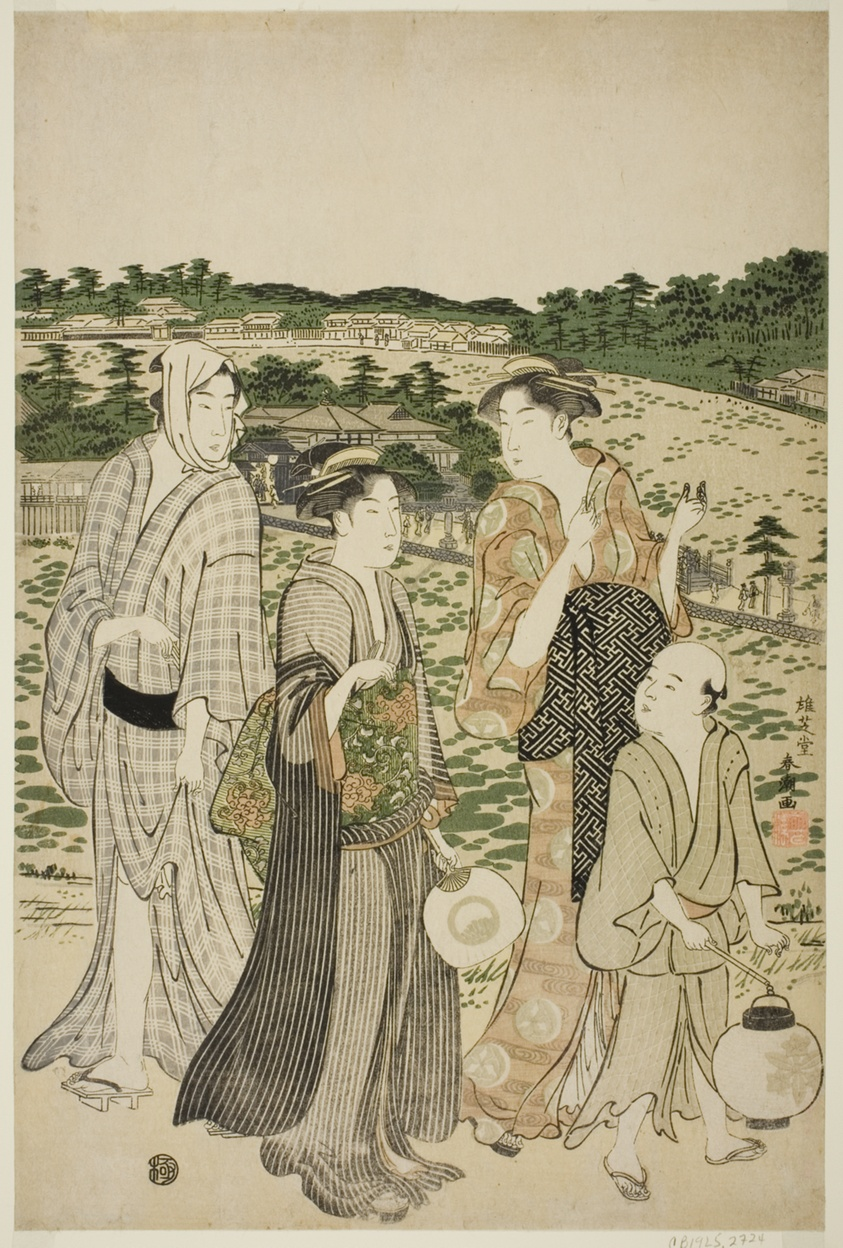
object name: Print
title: Benten Shrine in Shinobazu Pond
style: Japanese (culture or style)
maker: Katsukawa Shuncho; Japanese, active c. 1780-1801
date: late 1780s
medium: Color woodblock print; right sheet? of oban triptych (center: 1925.2725)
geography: Japan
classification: woodblock print; print; asian art